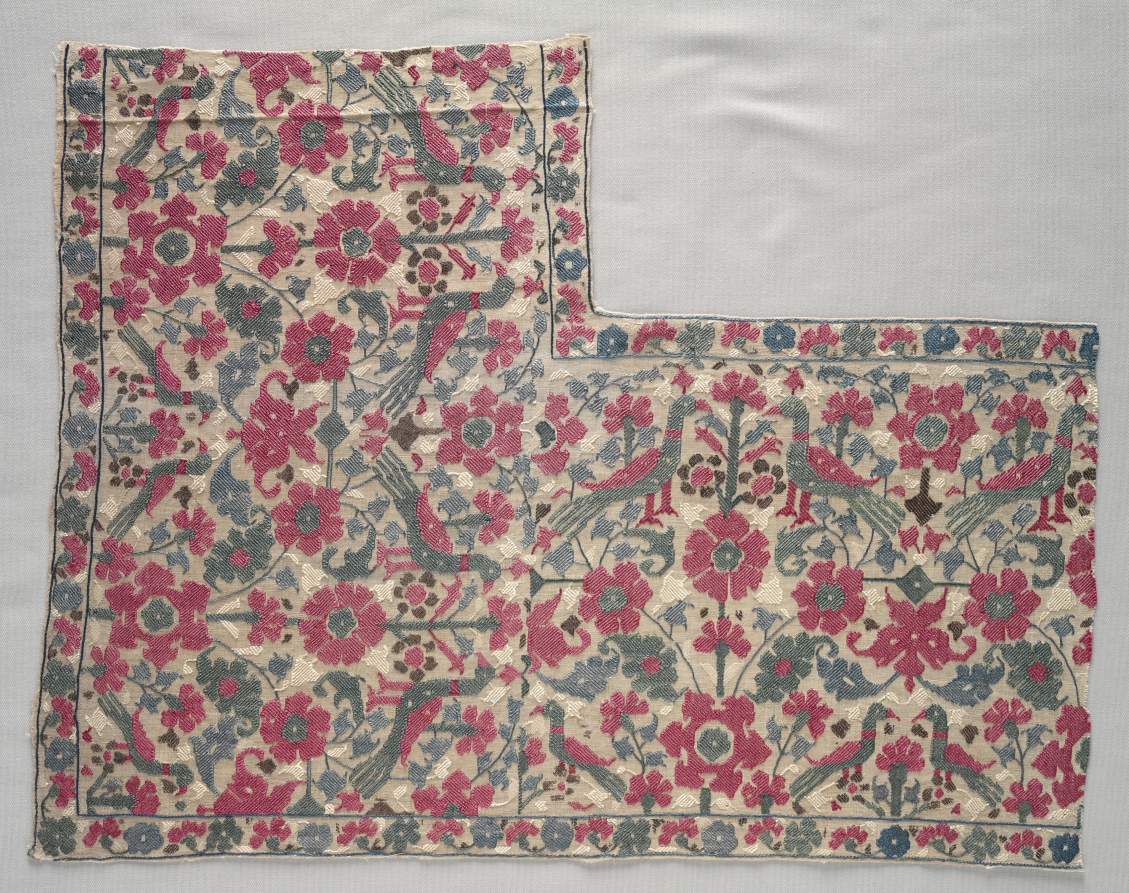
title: Portion of a Bed Sheet or Valance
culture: Greece, Sporades Islands, Skyros, 16th-17th century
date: 1500s - 1600s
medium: embroidery: silk on linen tabby ground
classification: Embroidery